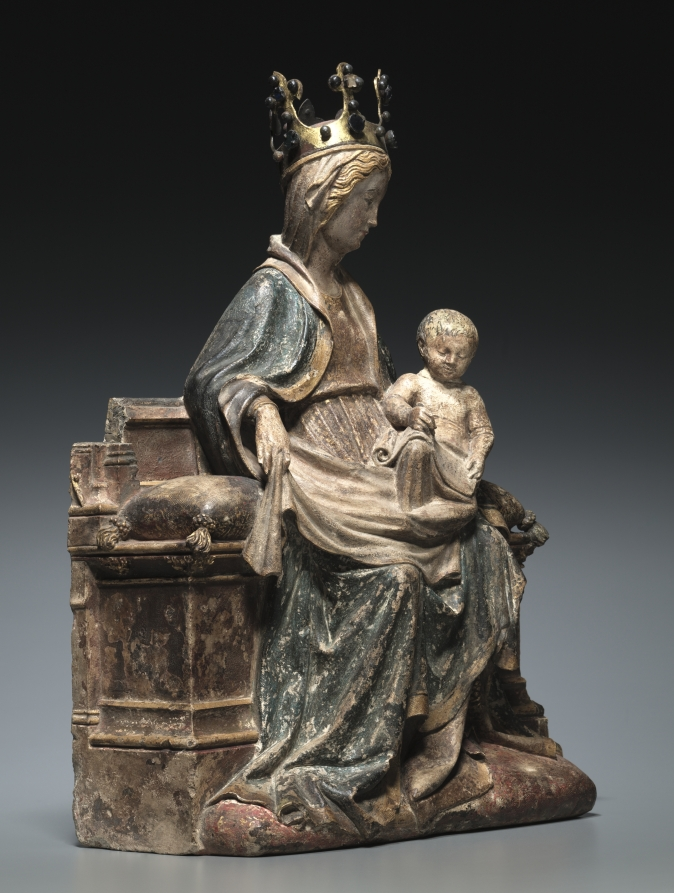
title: Enthroned Virgin with the Writing Christ Child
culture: Franco-Netherlandish, active Paris(?), 15th century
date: c. 1400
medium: limestone with polychromy and gilding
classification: Sculpture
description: This sculpture belongs to a tradition of seated Virgins that were prominent in Netherlandish art in the decades around 1400, and by extension may be associated with the Valois courts at Paris, Dijon, and Bourges. The theme of the Christ child who writes into an open book or onto a vellum banderole emerged during the third quarter of the 14th century and had great appeal among ecclesiastical and aristocratic clients. It undoubtedly refers to the educating and nurturing role of the mother in teaching the child, but also to the future position of the adult Christ as author and teacher. The small scale of this sculpture and the fact that its back is uncarved suggest that it was made for a small alcove or niche, appropriate in the intimate setting of a small chapel or oratory. The sculpture would have primarily been viewed from the front and perhaps from slightly below.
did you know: Here the Virgin is sitting on a highly decorated pillow.